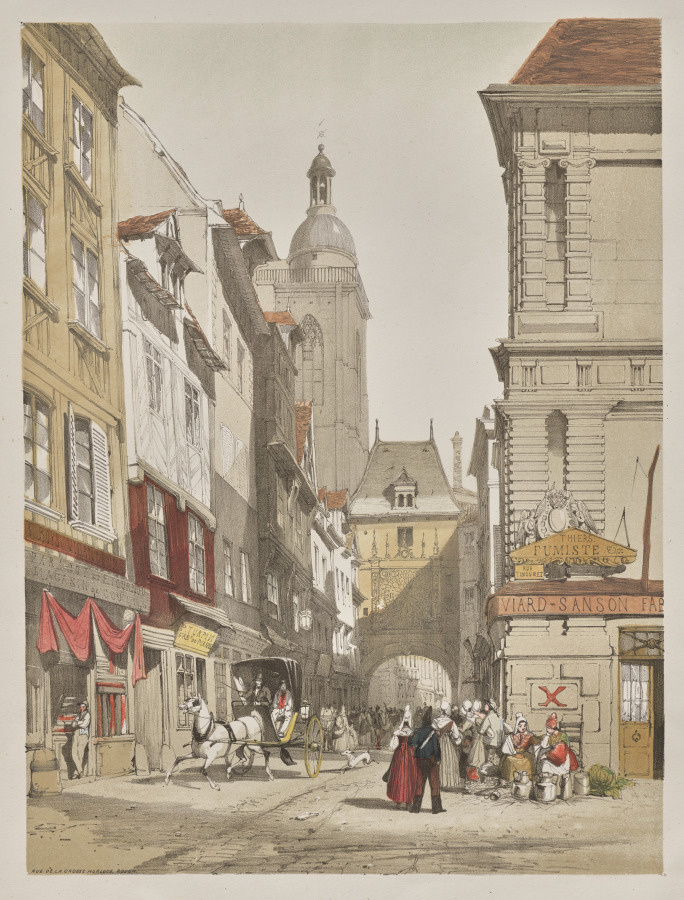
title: Picturesque Architecture in Paris, Ghent, Antwerp, Rouen: Rue de la Crosse Horlogue, Rouen, France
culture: England, 19th century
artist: Thomas Shotter Boys (British, 1803–1874)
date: 1839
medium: lithograph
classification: Portfolio